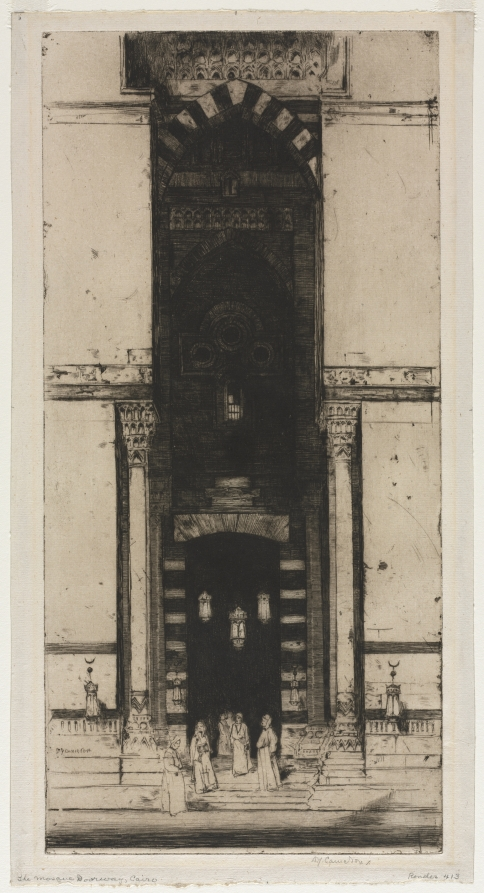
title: The Mosque Doorway, Cairo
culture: England, 20th century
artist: David Young Cameron (British, 1865–1945)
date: 1910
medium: etching and drypoint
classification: Print